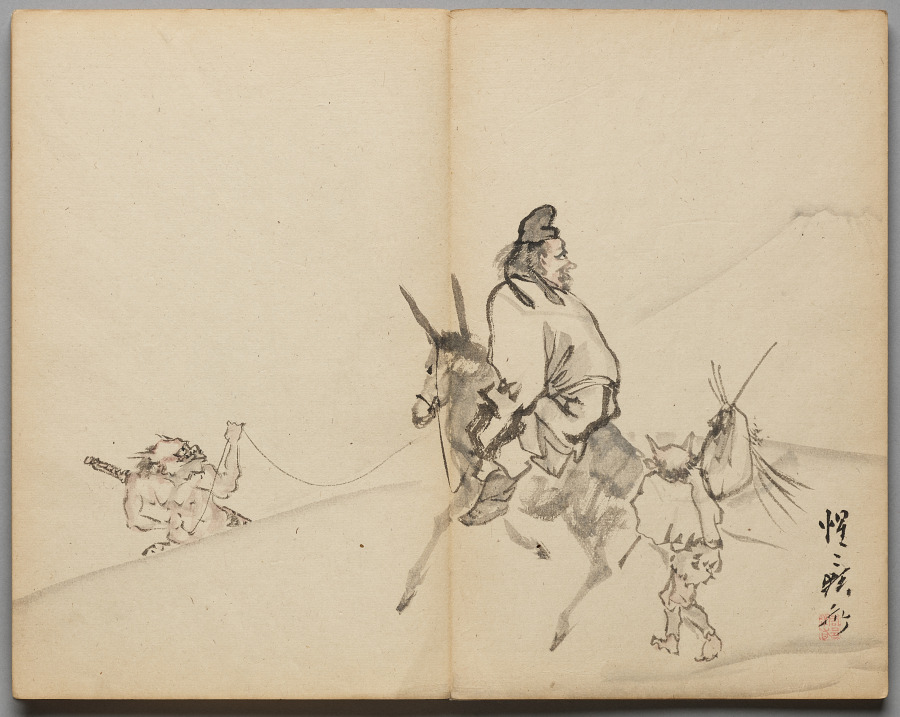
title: Zhong Kui from Sketch Album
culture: Japan, Edo period (1615–1868) to Meiji period (1868–1912)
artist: Kawanabe Kyōsai (Japanese, 1831–1889)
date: mid- to late 1800s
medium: Accordion-style book of 26 double-leaves; ink and color on paper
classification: Bound Volume